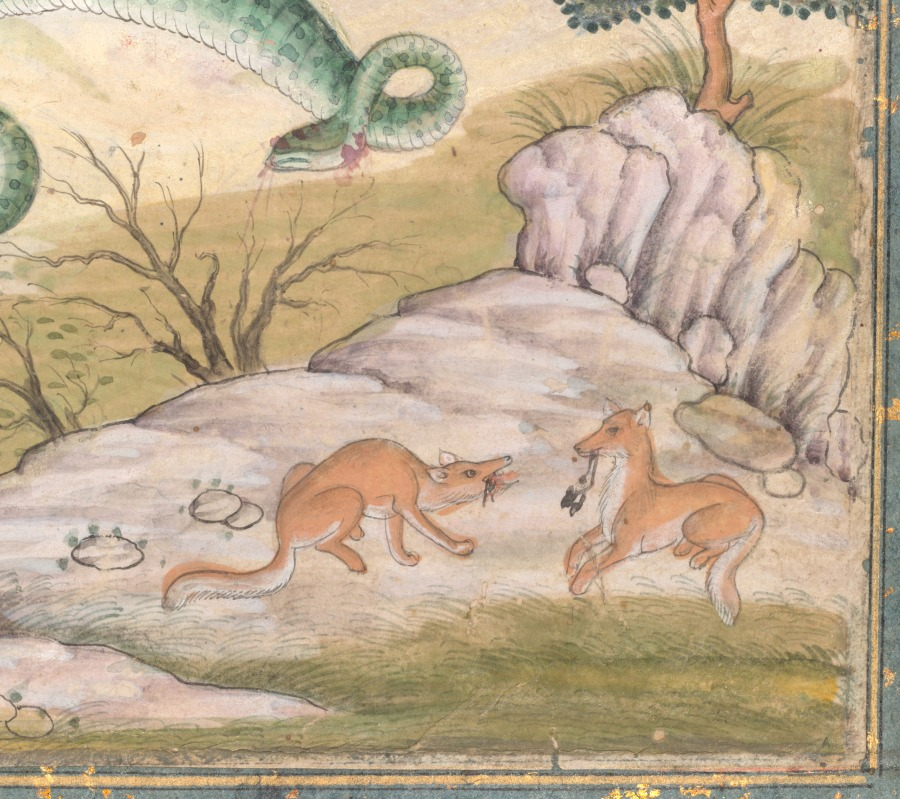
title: Lovers Parting, Page from a Book of Fables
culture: Northern India, Mughal court, 16th century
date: c. 1590–95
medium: Gum tempera and gold on paper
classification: Painting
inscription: Banyavati inscription in Devenagari script in left margin describing the subject of the miniature: 'We failed to understand each other when we were together, the understanding in that respect may come to us on being separated".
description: The lovers have met in a remote wilderness location, away from the city shown in the distance. However, their affair has run its course, and they decide to part ways, each walking in opposite directions through an ominous landscape, where strange rock formations and an oversized serpent-slain by foxes gnawing on its innards-lend a sense of foreboding. As Mughal court painting developed into the last decades of the 16th century, artists began using increasingly muted colors and gentler shading techniques than they did in the more robust Adventures of Hamza at the left. The omission of a light source and shadows adds to a timeless, otherworldly impression to the landscape.